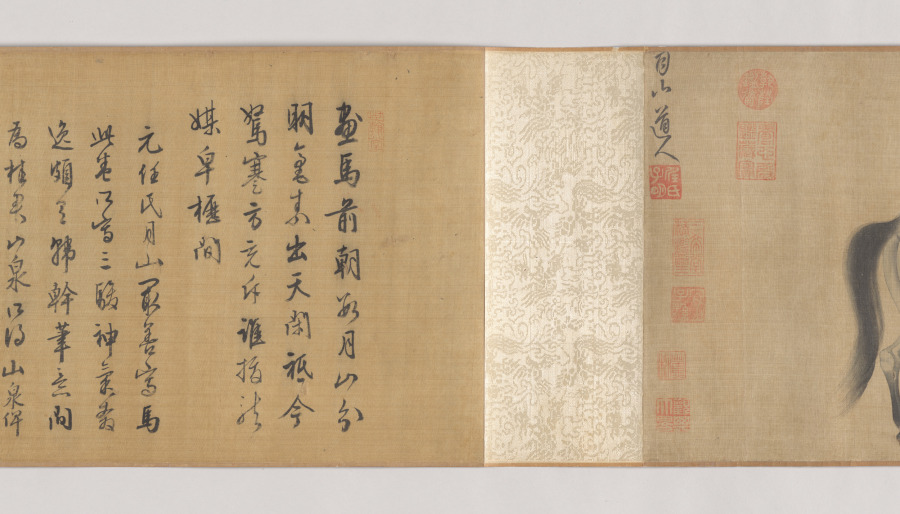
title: Three Horses and Four Grooms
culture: China, Yuan dynasty (1271-1368)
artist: Ren Renfa (Chinese, 1254–1328)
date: c. 1320s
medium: handscroll, ink and color on silk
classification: Painting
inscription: 月山道人. [印] 任氏子明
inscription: 1 colophon and 16 additional seals: 1 poem, 1 colophon dated 1552 or 1612, and 3 seals of Wang Yiying 王一瀛 (1500s); 2 seals of Liang Qingbiao 梁清標 (1620-1691); 6 seals of the Qianlong 乾隆 Emperor (r. 1736-95); 3 seals of the Jiaqing 嘉慶 Emperor (r. 1796-1821); 1 seal of the Xuantong 宣統 Emperor (r. 1908-12); 1 seal of Yu Xiezhong 余協中 (1900s).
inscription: Poem and colophon by Wang Yiying 王一瀛 (1500s): As for painters of horses in the previous dynasty, Surely the name of Yueshan [Ren Renfa] must come first. Under his brush and on his silk, They seem to have just galloped out from the imperial stud. Now as the world overflows with inferiority, Who, from the stable, can recognize a dragon-horse amidst mediocrity. Ren Yueshan [Ren Renfa] of the Yuan Dynasty was best in horse paintings. The three fine steeds he painted in this scroll are so dashing, so vigorous in spirit that they have indeed grasped some of the "brush-idea" of Han Gan. Not long ago this painting came into the possession of Mr. Gui Shanquan, who asked for my inscription. And I, while reading the old manuscripts of Hengshan [Wen Zhengming, 1470-1559], by accident, came cross the poem quoted above. As the ancients said "in painting horses, Master Han was [inspired by and produced] real horses; in composing poems, Master Su [Su Dongpo, the leading Song poet] wrote as if a painting were before him." These are truly what should be considered the two excellences; indeed, they are to be treasured. In the sixth month of the renzi year [either 1552 or 1612]. Jian feng shan ren [The Mountain Dweller of the Sword Peak], Wang Yiying, written in the Qu si ting Pavilion at Chiyang.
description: Ren Renfa's horse images are elegant in appearance and vigorous in spirit. His work attracted not only Chinese scholars but also the Mongols at the imperial court. Inspired by the contemporary scholarly interest in restoring a sense of antiquity in art—an artistic direction led by Zhao Mengfu that exerted a great impact in the Yuan art scene—Ren Renfa, like Zhao Mengfu, modeled his depictions of horses after the Song master Li Gonglin. Another key style component that Ren introduced to this genre was a revival of the Tang classical tradition. The refined color treatment of the horses as seen here was derived from the Tang master Han Gan.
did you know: Only the elegant first horse with a white blaze is accompanied by two grooms, as if its lightning speed required extra supervision.